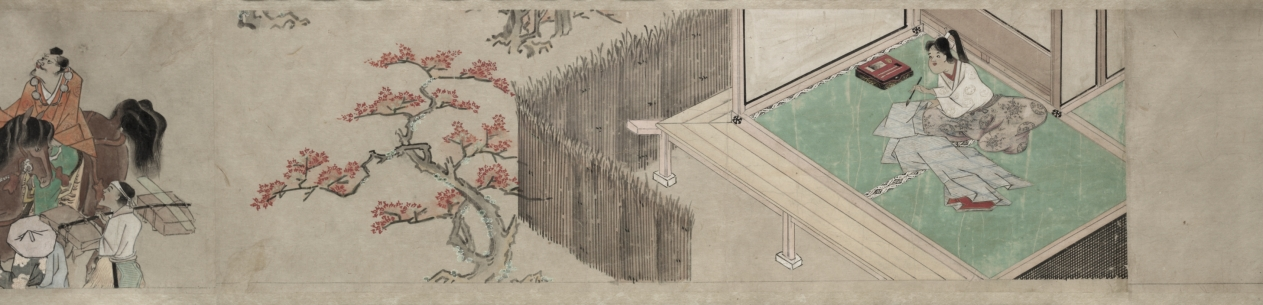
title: The Saltmaker's Story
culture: Japan, Edo period (1615–1868)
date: early 1600s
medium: One of a pair of handscrolls; ink, color, and gold on paper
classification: Painting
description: Once read and copied by girls at New Year’s celebrations and included in dowries, The Saltmaker’s Story is a rags-to-riches tale in which daughters are gifts from the gods. Despite his simple outlook, the main character progresses from humble roots as an associate at Kashima Shrine to the elite status of grandfather of the emperor through the intervention of the Kashima deity. The Saltmaker’s Story is traditionally presented in a set of three scrolls, but the text of this set has been removed by a previous owner, who remounted the illustrations as a pair. The paintings of this one take us from right to left through the first half of the tale.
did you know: This handscroll originally had texts before its paintings, but the texts were removed.